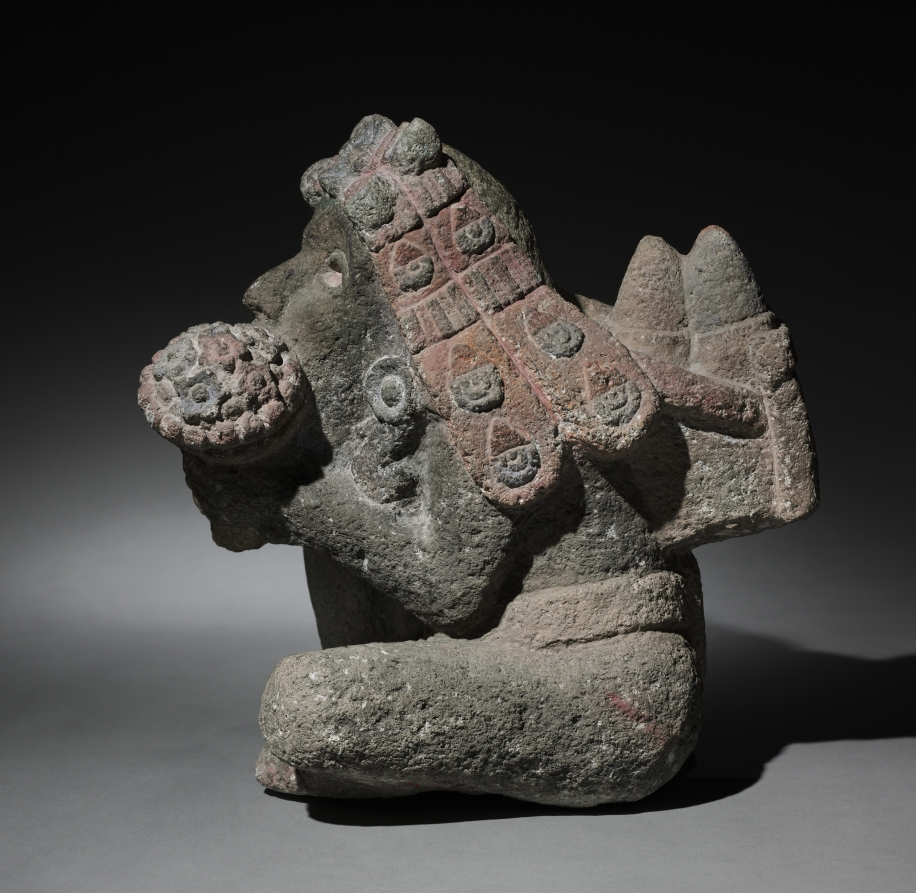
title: Seated Male Carrying Maize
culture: Central Mexico, Aztec style, 13th-16th century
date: 1325–1521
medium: stone, pigment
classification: Sculpture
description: This figure probably represents an Aztec deity-either Macuilxochitl or Xochipilli-whose domain was beauty, the arts, and such pleasures as gameplaying, dancing, and sex. Both names include the Aztec word for "flower," and in one hand the figure holds a cone of flowers, perhaps the blossoming crown of a cactus. For the Aztecs, flowers signified beauty, refinement, and fertility in general and sexuality in particular. The burden of maize cobs on his back also may allude to his creative energies.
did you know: Macuilxochitl is one of five gods of excess pleasure, and the punishment that follows.